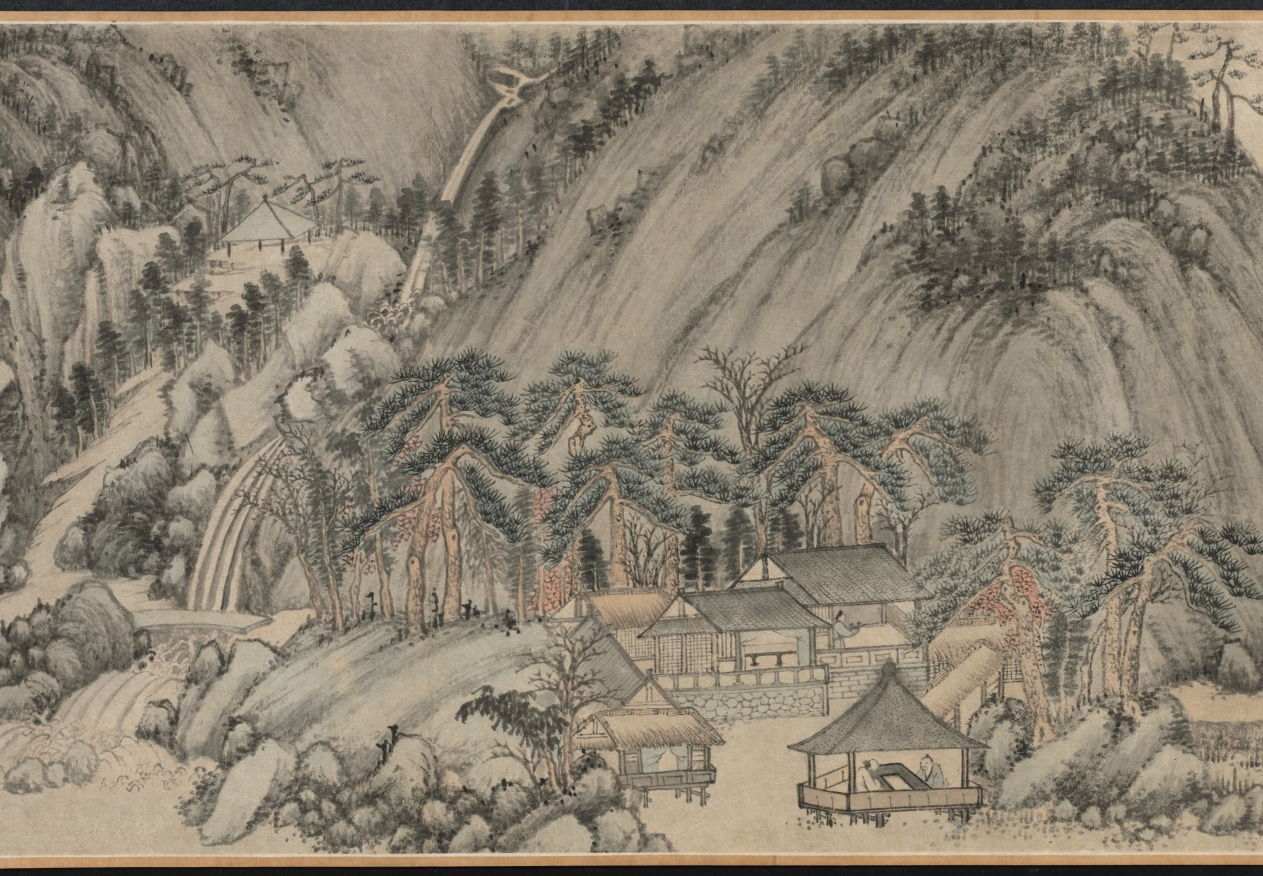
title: Mt. Taibo in the Style of Wang Meng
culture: China, Ming dynasty (1368–1644)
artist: Du Qiong (Chinese, 1396–1474)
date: 1442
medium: handscroll; ink and light color on paper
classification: Painting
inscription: Artist's inscription, signature, and 11 seals: [1 seal] Tung-yüan chai. Huang-ho-shan-ch'iao [Wang Meng] painted a painted called T'ai-po Mountain. Its brushwork is superior and admirable, which is very close to Yu-ch'en [Wang Wei, 699-759]. The cleverness of its composition, the maple groves and rustic temples, the inaccessible ravines and autumnal plateaus, the periolous peaks and strange rocks, etc., all seem to be so natural. The paper is only a little over eight feet, but the landscape has the range of a thousand miles. Once you open and note the contents, it is as if one were roaming among the mountain peaks enveloped in mist and clouds, and forgot the dusty world. When I first saw this, I was so mixed with excitement and joy that I could not take my hands off the painting. So I put it on the table, and tried my best to imitate it, forgetting sleeping and eating for about three months before it was completed. Although I do not dare to tread in the footsteps of Huang-ho shan ch'iao, I took great pains to capture his spirit in composition and colors. I do not know whether it would pass the judgment of the experts. On the fifteenth day of the fifth month, the seventh year of the Cheng-t'ung year [1442], inscribed by Tung-yüan, Tu Chiung. [2 seals] Yung-chia; Ching-chieh ming-men. [8 seals on painting] Tung-yüan chai; Ching-chieh ming-men; Yung-chia; Tu Ch'iung yin; Tung-yüan (repeated 5 times). trans. WKH/LYSL 3 colophons and 7 additional seals: 1 colophon and 2 seals of Chou Ting (1401-1487); 1 colophon and 2 seals of Wu K'uan (1435-1504); 1 colophon, dated 1655, and 2 seals of Lan Ying (1585-after 1664).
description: When a Chinese painter "imitated" a painting by a past master, the intention was never to produce an exact copy. Du Qiong, the Ming painter from Suzhou, is a case in point. The painting style of this handscroll is actually closer to that of Huang Gongwang (1269–1354) than to the style of Wang Meng (about 1301–1385). Both masters were active during the previous dynasty and are among the so-called Four Great Masters of the Yuan dynasty (1279–1368). In this painting, the interplay of styles, including Du Qiong's own, contribute to an inner dimension that is more than visual. Mt. Taibo is located in the province of Zhejiang and is known for its scenic beauty. In this scroll, however, it is not depicted literally. The image is an ideal representation of mountains in southeastern China.